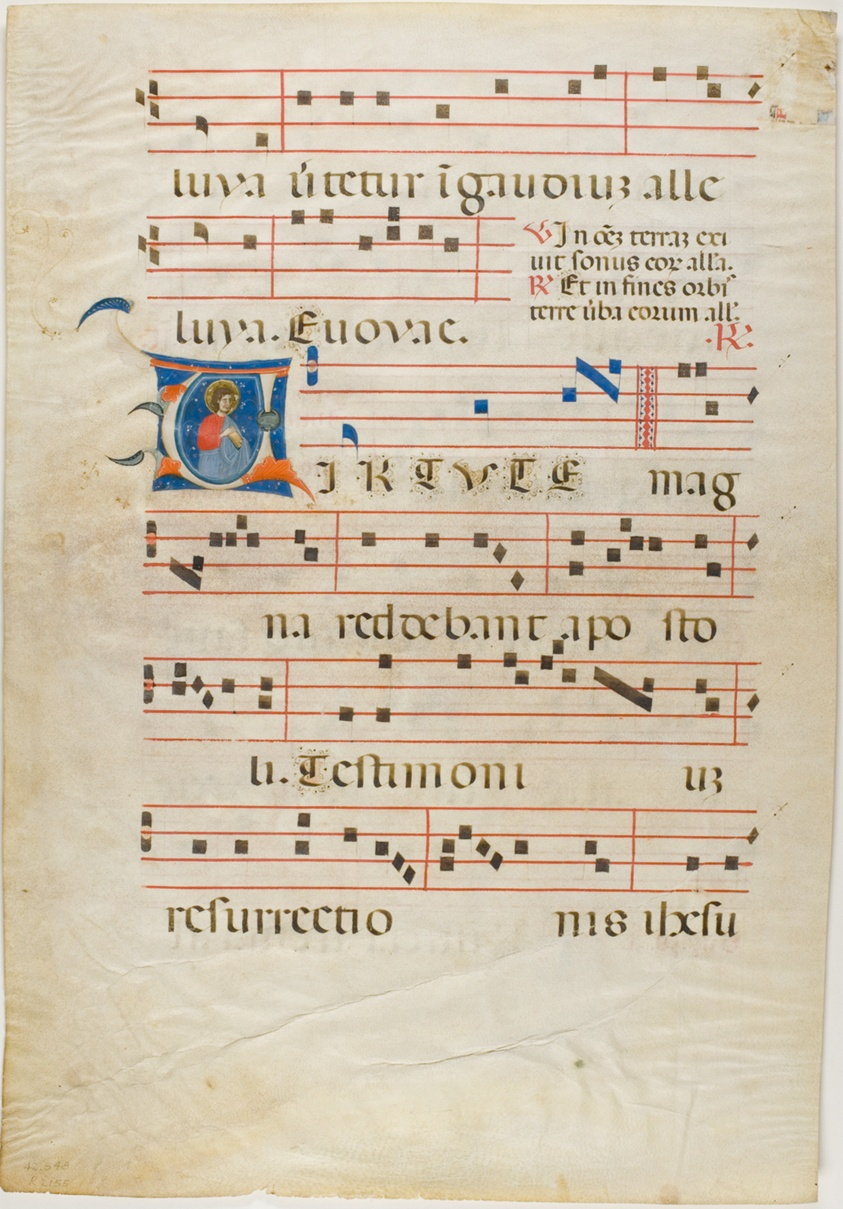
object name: Drawing and Watercolor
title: Martyr Saint in a Historiated Initial "V" from an Antiphonary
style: medieval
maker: Italian (Rimini); workshop of Neri da Rimini (Italian, active 1300-1338)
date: 1310/15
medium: Manuscript cutting in tempera and gold leaf, with gothica textualis and rounded gothica textualis inscriptions in Latin in black ink, ruled in red, and with other decorations, on parchment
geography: Italy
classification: tempera; manuscript; drawings (visual works); prints and drawing